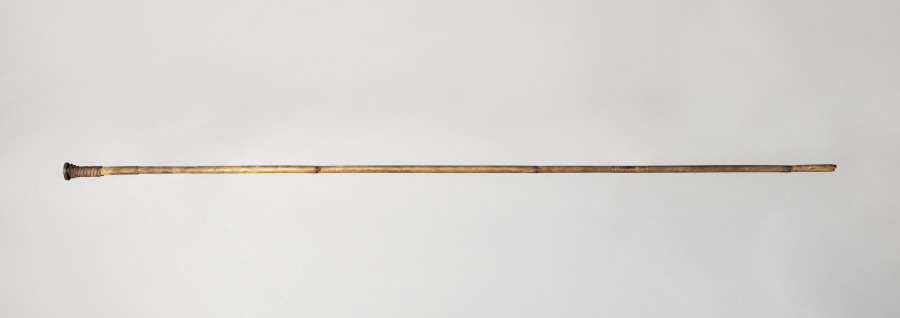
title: Arrow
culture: Philippines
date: before 1922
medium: reed shaft, metal tip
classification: Arms and Armor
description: This straight, lightweight arrow shaft is made from a single length of bamboo. Its surface is smooth and undecorated, with slight natural tapering toward the point. Shallow notches are cut at the rear end for attaching the bowstring.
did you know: The Aeta people typically used arrows like this one for hunting small game and birds.